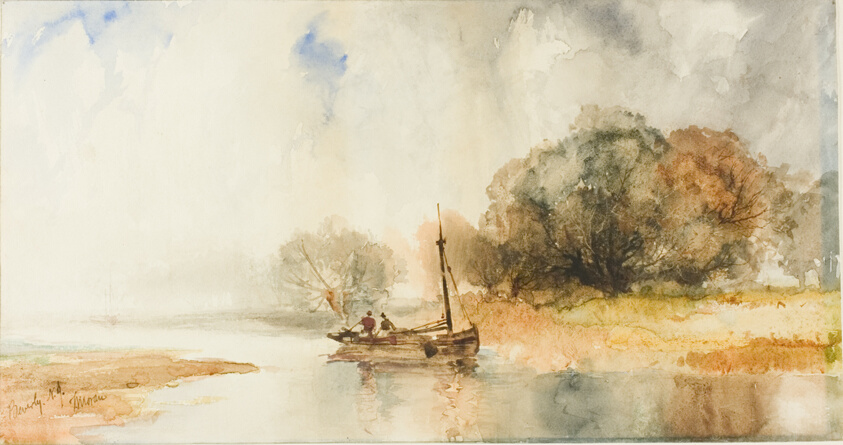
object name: Drawing and Watercolor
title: Beverly N.J.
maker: Thomas Moran (American, born England, 1837-1926)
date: 1880/89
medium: Watercolor on ivory wove paper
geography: United States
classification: watercolor; drawings (visual works); prints and drawing